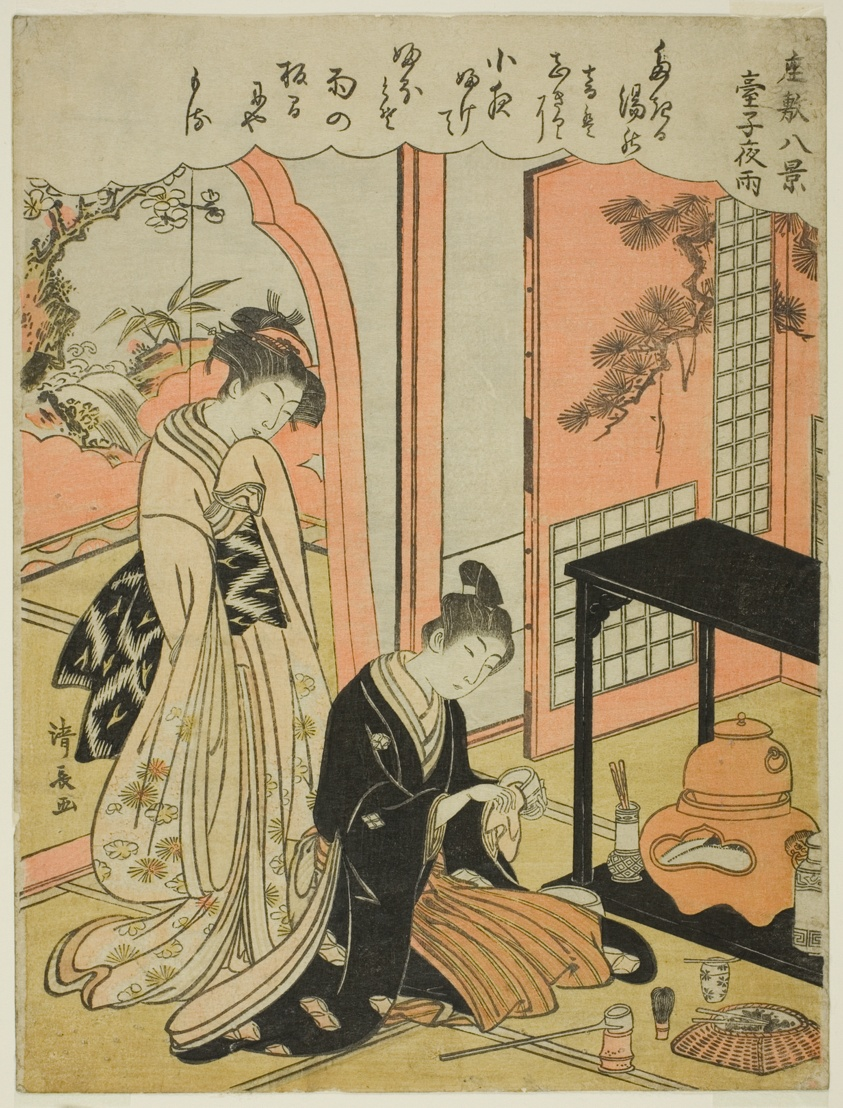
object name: Print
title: Night Rain of the Tea Stand, from the series "Eight Scenes of the Parlor (Zashiki hakkei)"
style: Japanese (culture or style)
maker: Torii Kiyonaga (Japanese, 1752-1815)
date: c. 1777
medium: Color woodblock print; chuban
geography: Japan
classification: woodblock print; print; asian art